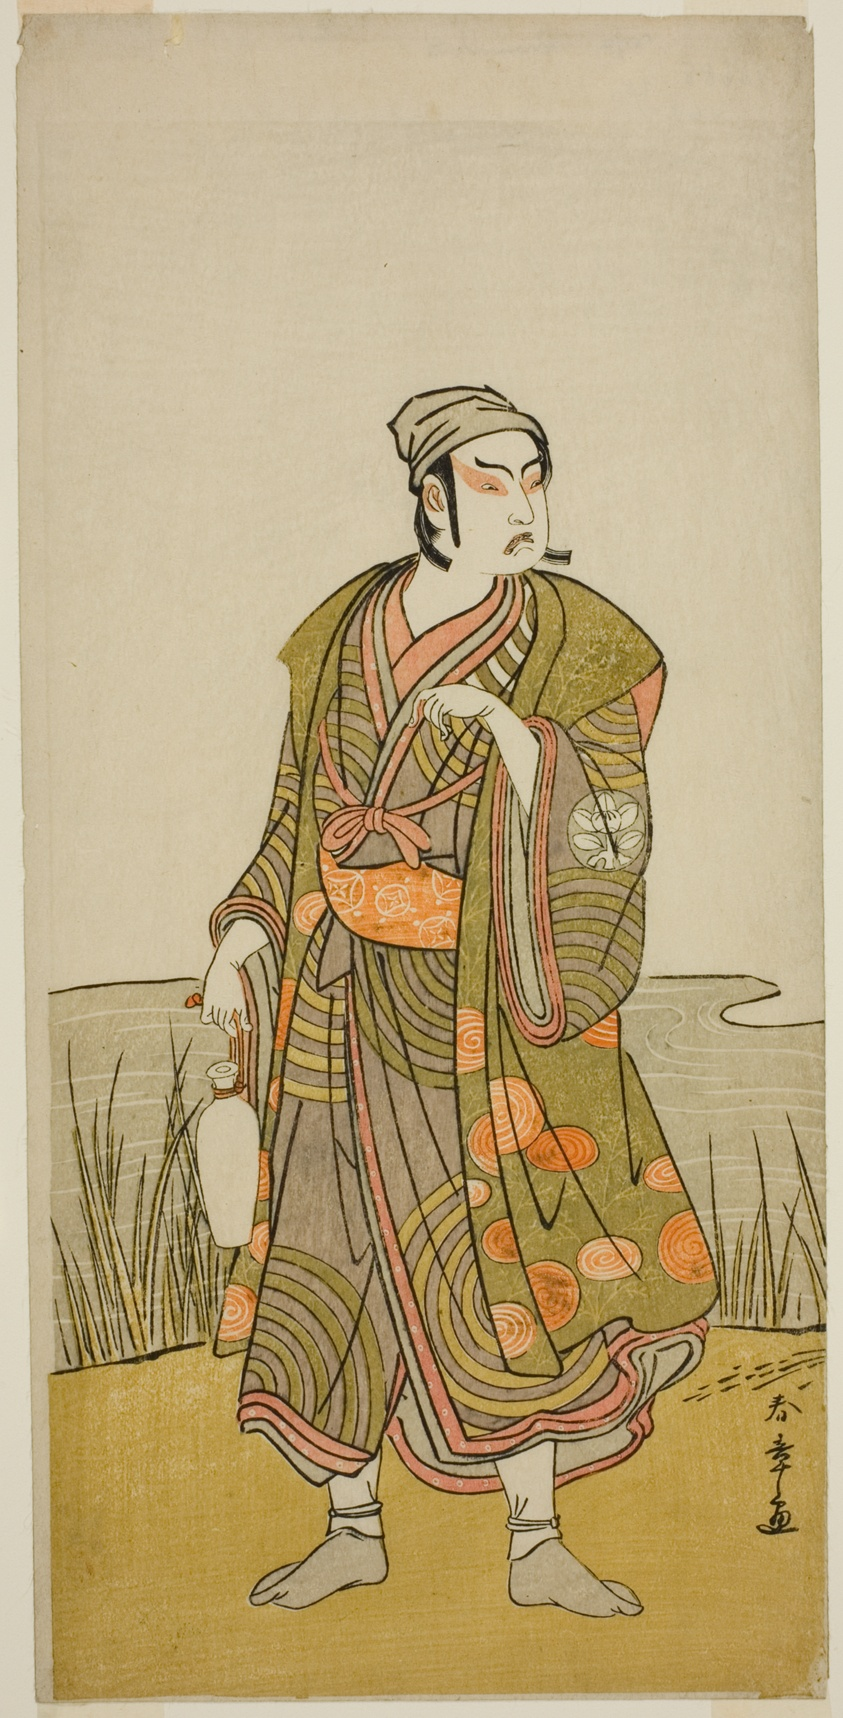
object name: Print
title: The Actor Ichimura Uzaemon IX as the Potter Tsuchihei in the Play Higashiyama Momiji no Kadode, Performed at the Ichimura Theater in the Ninth Month, 1778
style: Japanese (culture or style)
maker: Katsukawa Shunsho 勝川 春章; Japanese, 1726-1792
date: c. 1778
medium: Color woodblock print; hosoban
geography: Japan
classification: woodblock print; print; asian art